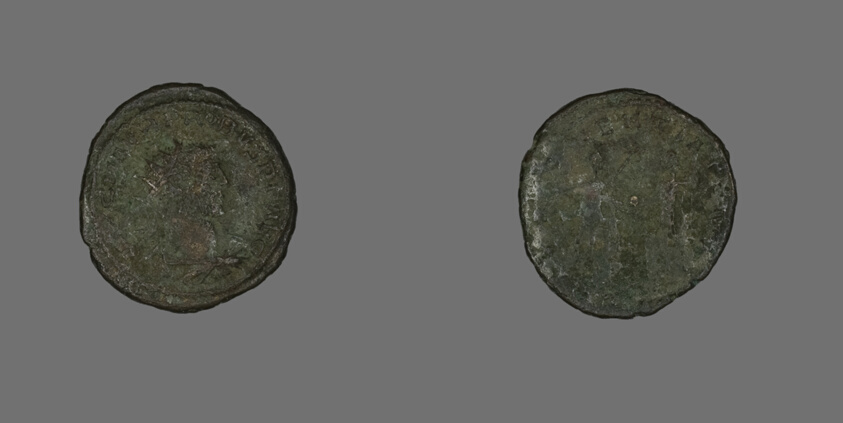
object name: Coin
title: Antoninianus (Coin) Portraying Emperor Probus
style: roman (ancient, style or period), ancient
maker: Roman, minted in Siscia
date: 276-281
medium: Billon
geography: Roman Empire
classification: coin; ancient art